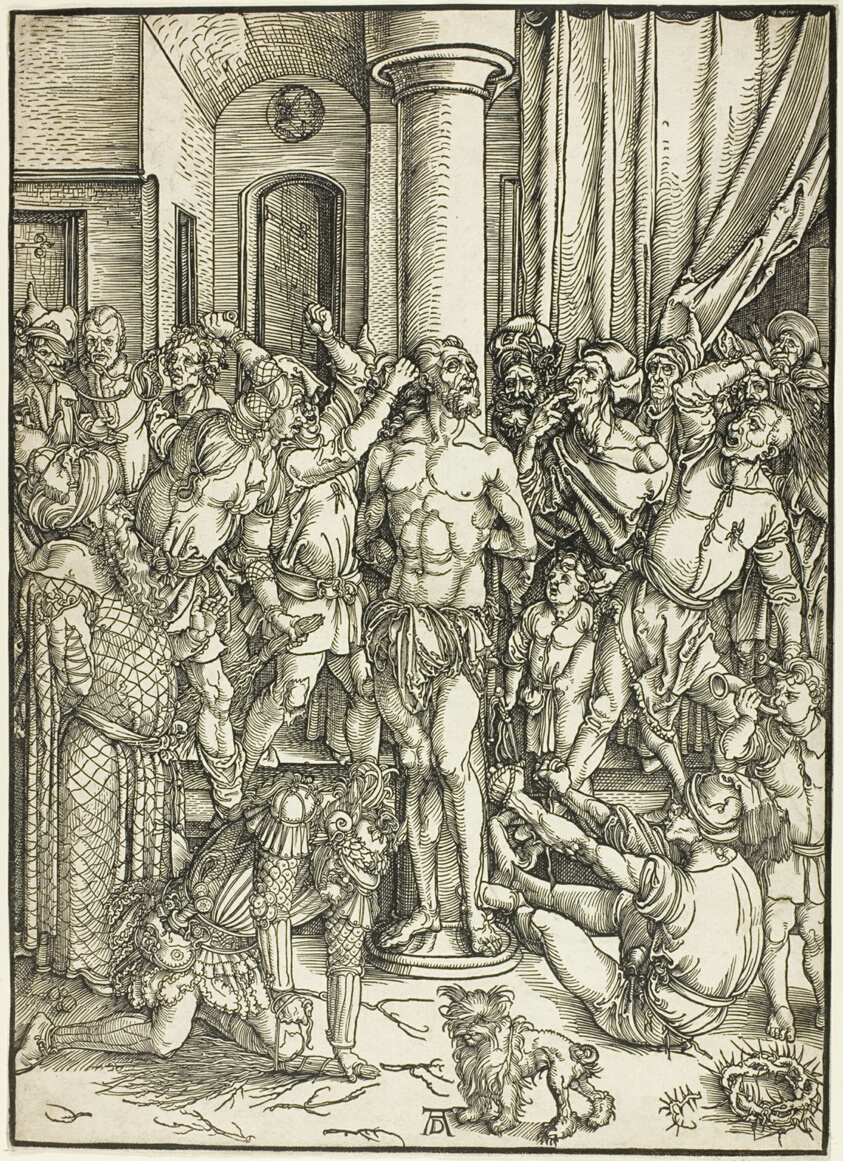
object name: Print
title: The Flagellation, from The Large Passion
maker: Albrecht Dürer (German, 1471-1528)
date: c. 1496–97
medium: Woodcut in black on ivory laid paper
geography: Germany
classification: woodcut; print; prints and drawing; paper